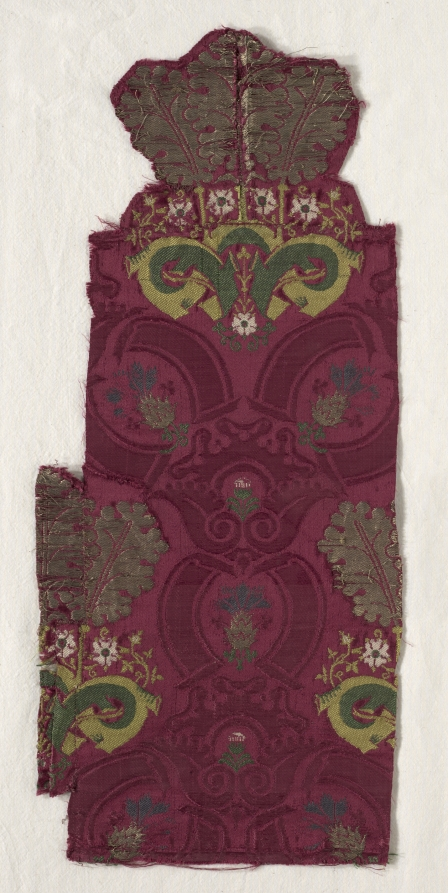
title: Fragment of Silk Textile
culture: Spain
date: 1700s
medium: plain cloth, brocaded; silk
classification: Textile